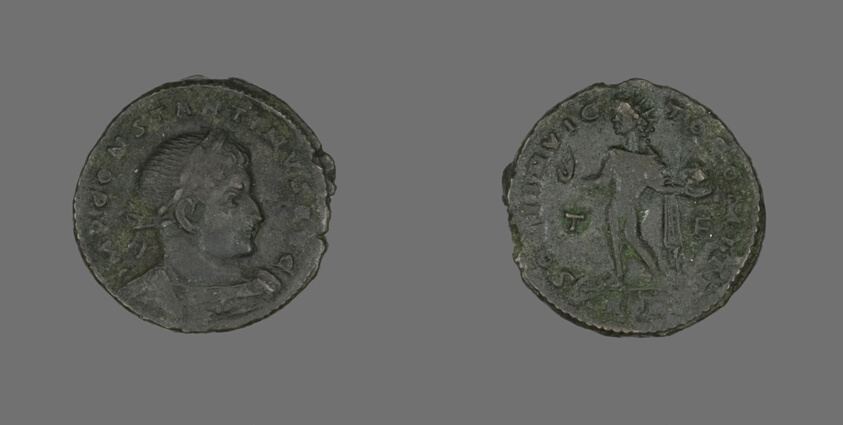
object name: Coin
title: Coin Portraying Emperor Constantine I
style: roman (ancient, style or period), ancient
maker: Roman, minted in Trier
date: 307-337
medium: Bronze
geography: Roman Empire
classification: coin; ancient art